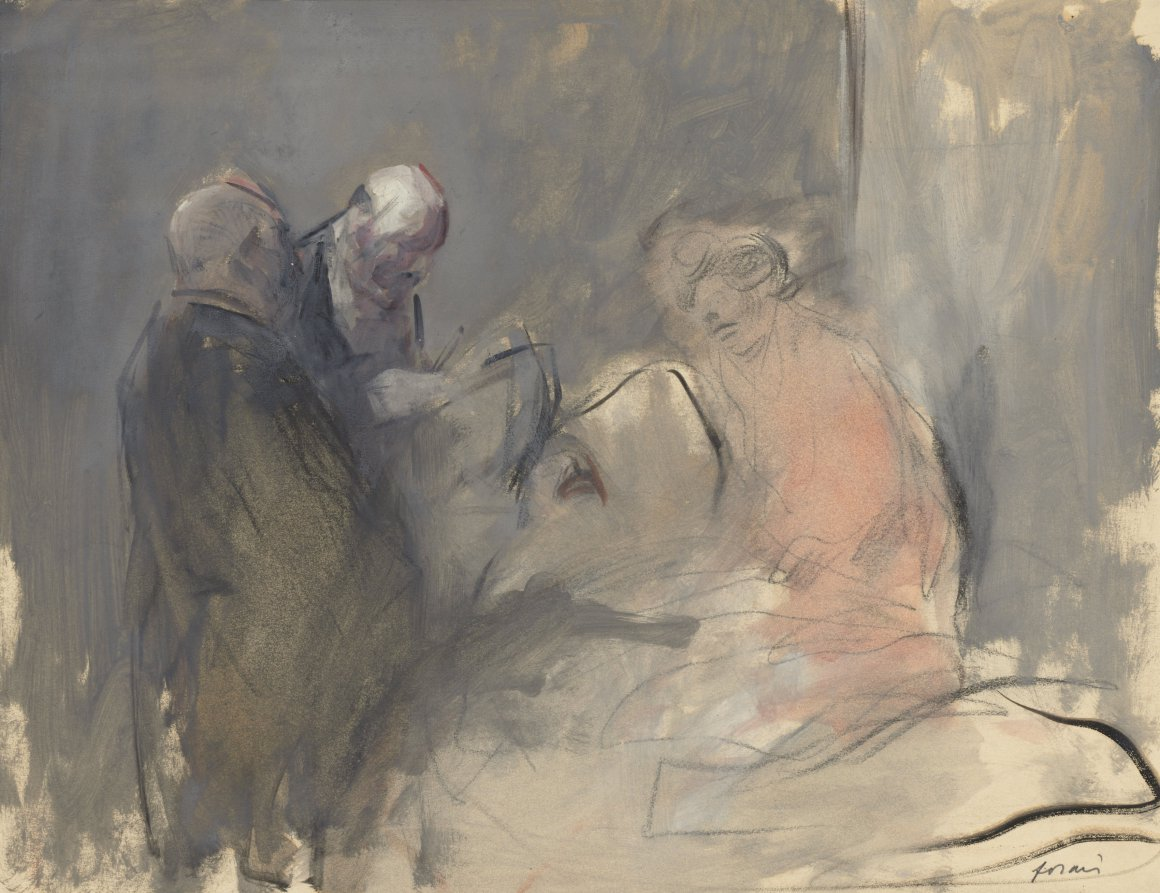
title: In the Hospital (recto)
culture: France, late 19th-early 20th Century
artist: Jean Louis Forain (French, 1852–1931)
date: fourth quarter 1800s or first third 1900s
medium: watercolor and gouache over black crayon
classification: Drawing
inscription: signed, lower right, in graphite: forain ; lower left, in graphite: 61 ; lower right, in graphite: A 2334